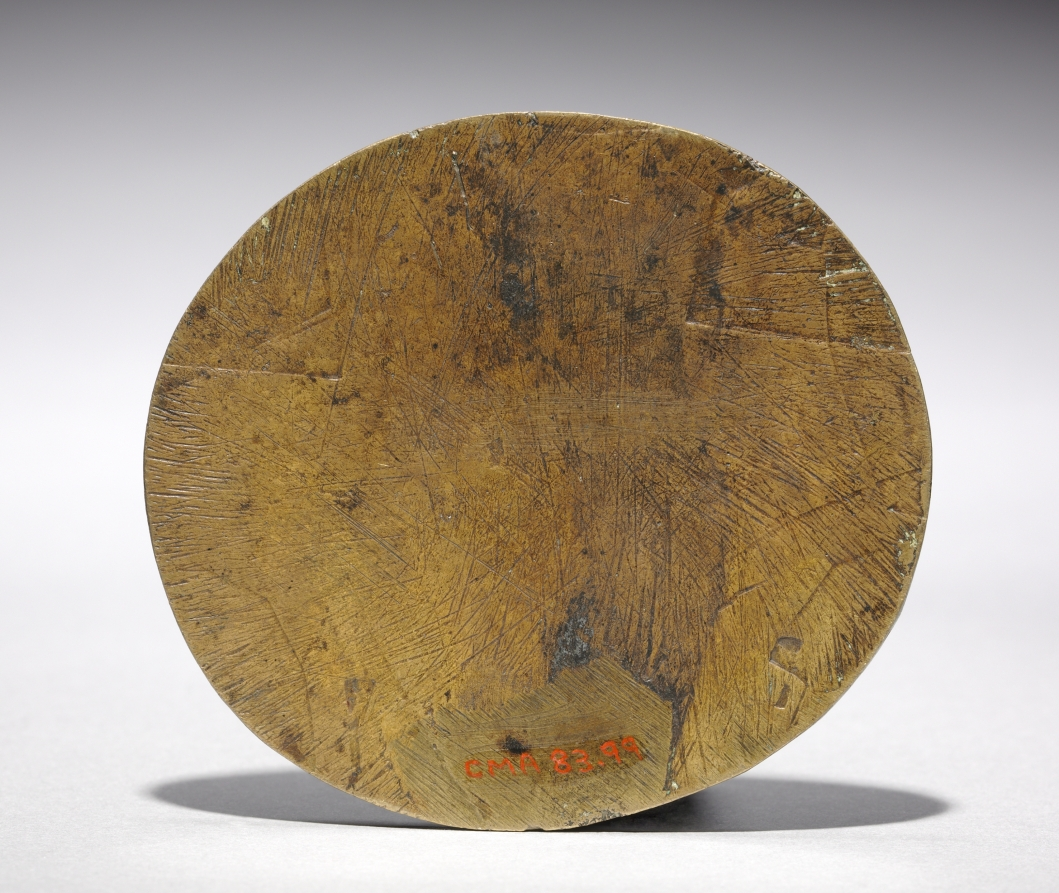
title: The Betrayal of Christ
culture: Italy, 16th century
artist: workshop of Valerio Belli (Italian, c. 1468–1546)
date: c. 1525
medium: bronze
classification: Sculpture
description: Born in Vicenza, Belli worked in Rome as a successful crystal and gem engraver, goldsmith, and medalist. His bronze plaquettes come almost without exception from crystal or hardstone carvings. This particular plaquette directly derives from a rock crystal intaglio by Belli bearing the same inscription in the Biblioteca Apostolica Vaticana, which originally was mounted with two other oval medallions of Christ Carrying the Cross and the Entombment in the silver-gilt base of a rock crystal crucifix, also in the collection of the Vatican Library. This crucifix is generally identified as the one, according to Vasari, created for Clement VII for which Belli received a payment of 1,111 gold ducats in 1525.